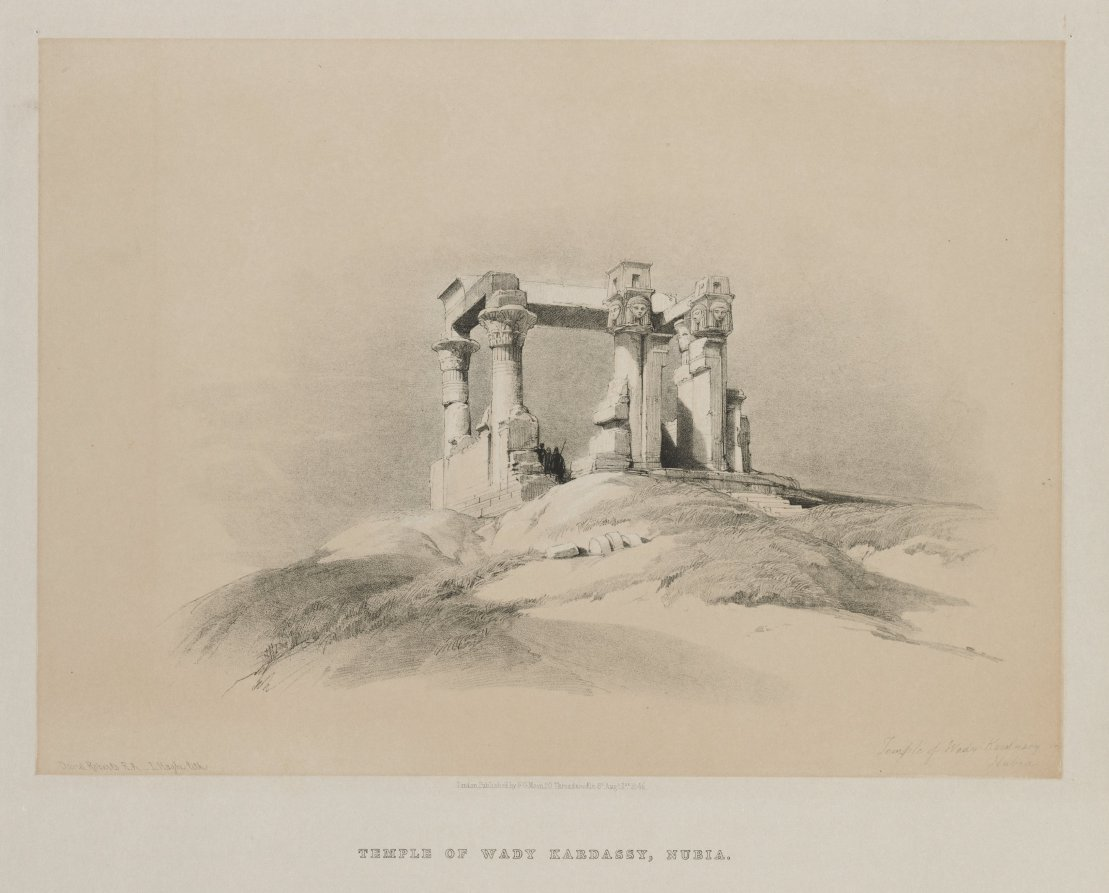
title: Egypt and Nubia, Volume I: Temple of Wady Kardassy in Nubia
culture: England, 19th century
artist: Louis Haghe (British, 1806–1885)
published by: F. G. Moon, 20 Threadneedle Street, London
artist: after David Roberts (Scottish, 1796–1864)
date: 1846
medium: color lithograph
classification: Print